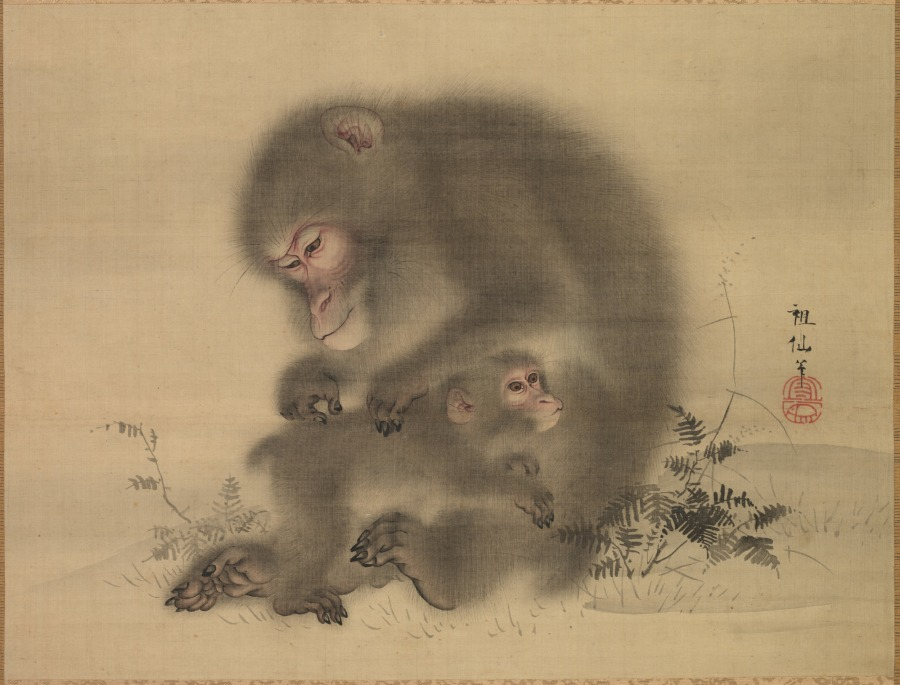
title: Monkeys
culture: Japan, Edo period (1615–1868)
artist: Mori Sosen (Japanese, 1747–1821)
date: early 1800s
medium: hanging scroll; ink and light color on silk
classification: Painting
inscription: Signature and seal